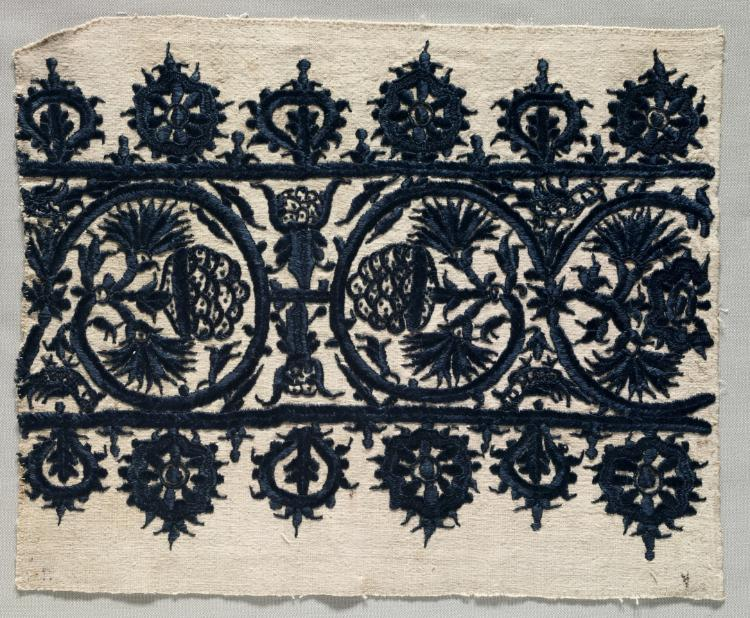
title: Fragment of a Skirt Border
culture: Greece, Crete, 18th century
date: 1700s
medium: embroidery: silk on linen tabby ground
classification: Embroidery